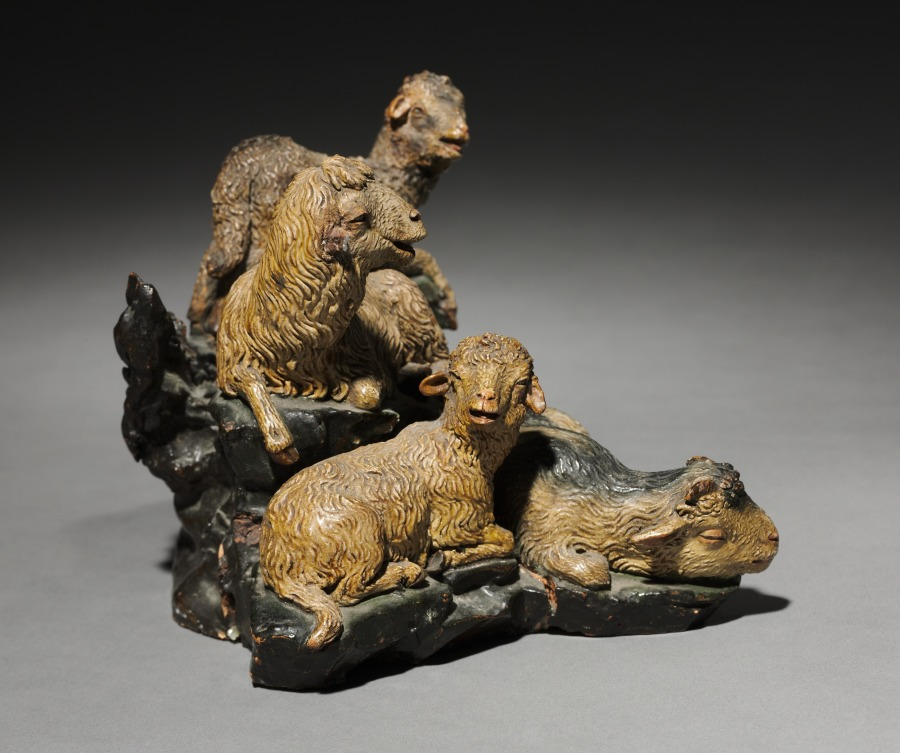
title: Figure from a Crèche: Group of Four Sheep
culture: Italy, Naples, late 18th-early 19th century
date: 1780–1830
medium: painted terracotta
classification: Sculpture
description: The practice of creating scenes of the Nativity for the home dates from the early 1700s in Italy, where people began to set up doll-like figures of about a foot or less in height. The custom was particularly popular in Naples around 1800, where crèche scenes (crèche means cradle, or crib) included many figures, whose heads and hands of painted terracotta, stuffed cloth bodies, and clothing adapted from contemporary local costumes gave them an amazingly realistic character. Representations of the birth of Jesus can be traced to the first few centuries of Christianity. Both living creatures and sculptural depictions of them were used from early times. By the late middle ages it was customary to create life-size figures of wood or stone, naturalistically painted, to represent the characters who participated in the events of Jesus's early life. These sculptures were then arranged in scenes illustrating one or both of the most important of these events, the Adoration of the Shepherds and the Adoration of the Magi-the three kings from the East who came to pay homage to the Christ child. Used in churches, these large figures were especially popular in Italy, Central Europe, Spain, and Portugal.